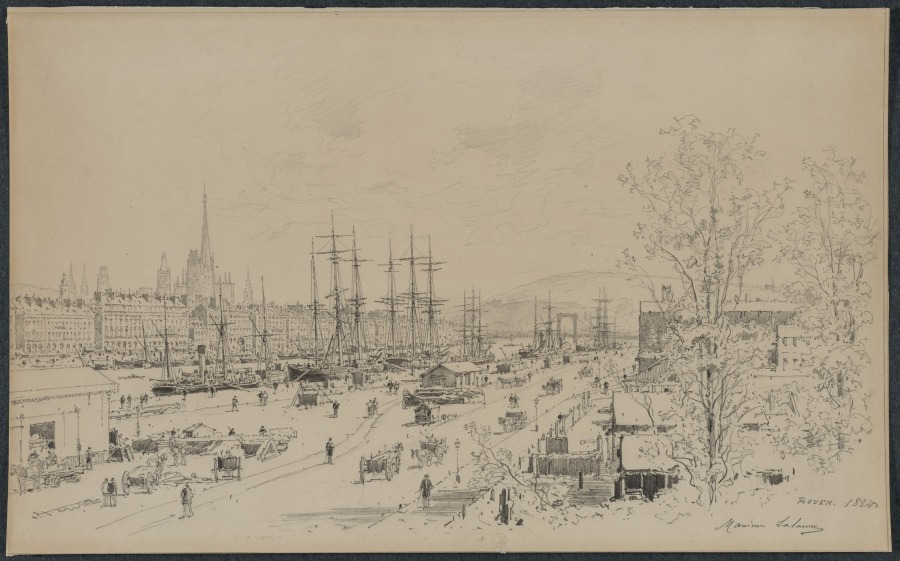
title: Port of Rouen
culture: France, 19th century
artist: Maxime Lalanne (French, 1827–1886)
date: 1884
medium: graphite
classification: Drawing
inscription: signed, lower right, in graphite: ROUEN. 1884 / Maxime Lalanne ; VERSO, lower right, in graphite: R[zl?] ; lower right, in graphite: [three lines of matting notations, partially erased]